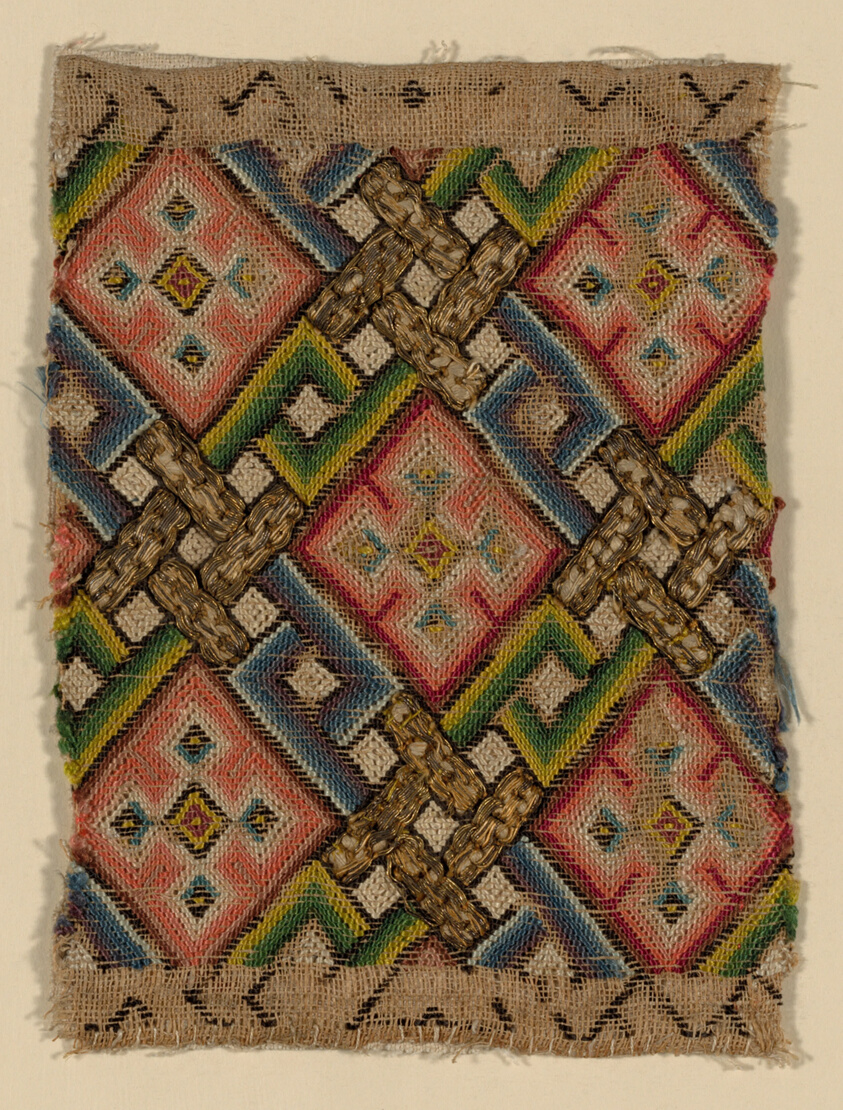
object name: Textile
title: Fragment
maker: Italy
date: 17th century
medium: Linen, plain weave; embroidered with silk floss, and gilt- and silvered-metal-strip-wrapped silk in tent stitches; padded couching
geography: Italy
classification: textile; needlework (visual works)